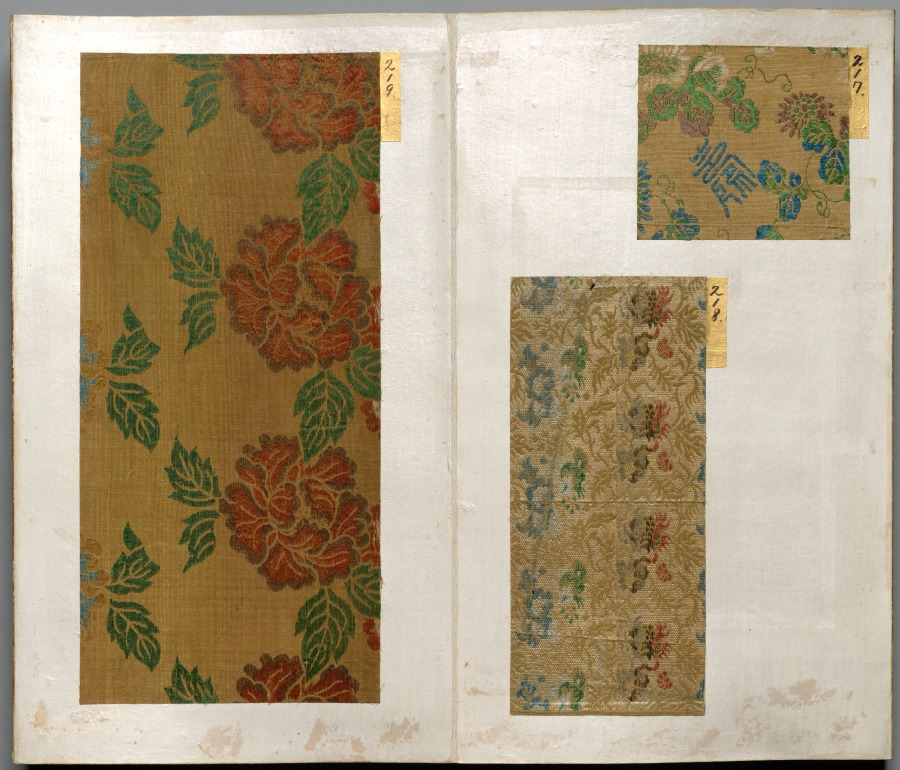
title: Album of Textile Samples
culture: Japan, Edo period (1615–1868)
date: 1600s-1700s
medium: silk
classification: Textile